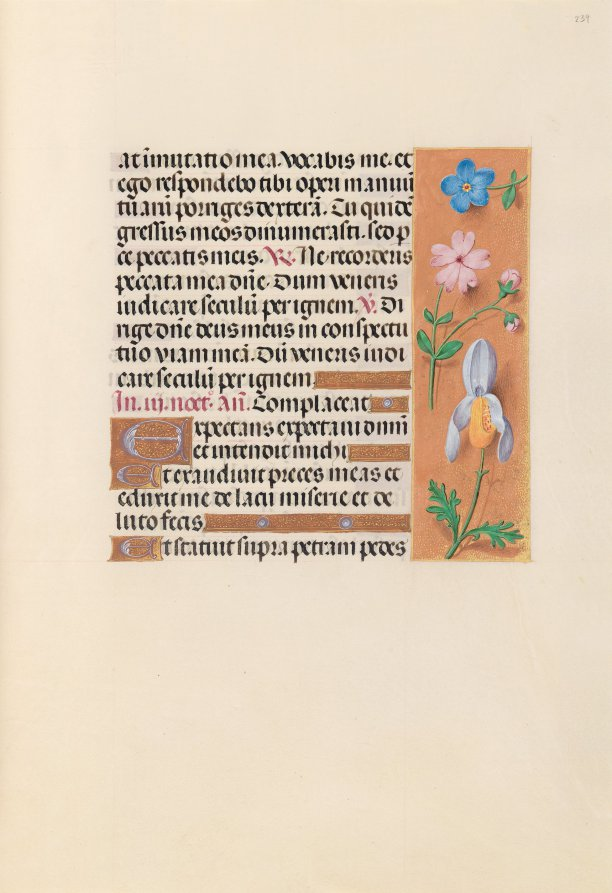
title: Hours of Queen Isabella the Catholic, Queen of Spain: Fol. 239r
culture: Flanders, Ghent and Bruges, late 15th century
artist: Master of the First Prayerbook of Maximillian (Flemish, c. 1444–1519)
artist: and Associates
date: c. 1500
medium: ink, tempera, and gold on vellum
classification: Bound Volume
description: This manuscript was illuminated by a circle of at least five highly organized manuscript painters active in the Flemish cities of Ghent and Bruges. The principal illuminator was Alexander Bening, who painted the majority of the book's miniatures. Manuscripts produced by this circle of artists are renowned for the decoration of their borders, which typically feature a rich variety of realistically-painted flowers, birds, and butterflies. This prayer book, called a book of hours, was intended not for a cleric, but for the private devotions of a lay person-in this case, Isabella the Catholic, Queen of Spain (1451-1504). Isabella's coat of arms embellishes the book's frontispiece. It is unlikely that the book was commissioned by the Queen herself; rather, she probably received it as a diplomatic gift from someone courting her patronage, perhaps Cardinal Francisco Jimenez de Cisneros. A Franciscan friar, Jimenez was dependent upon Isabella for his advancement, first to the post of Queen's confessor in 1492, and then to Archbishop of Toledo in 1495.